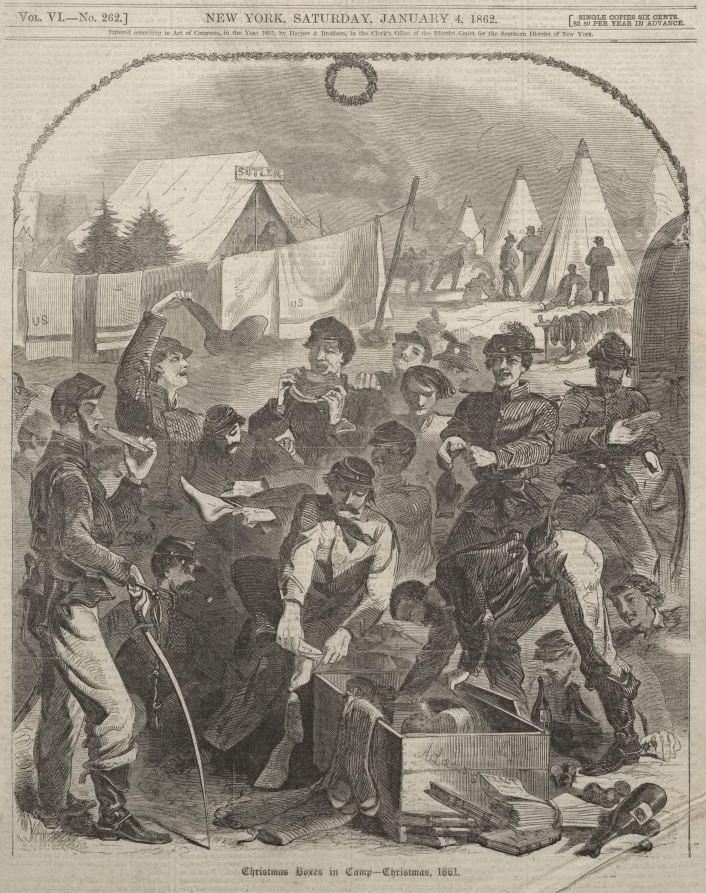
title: Christmas Boxes in Camp - Christmas, 1861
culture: America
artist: Winslow Homer (American, 1836–1910)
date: 1862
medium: wood engraving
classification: Print